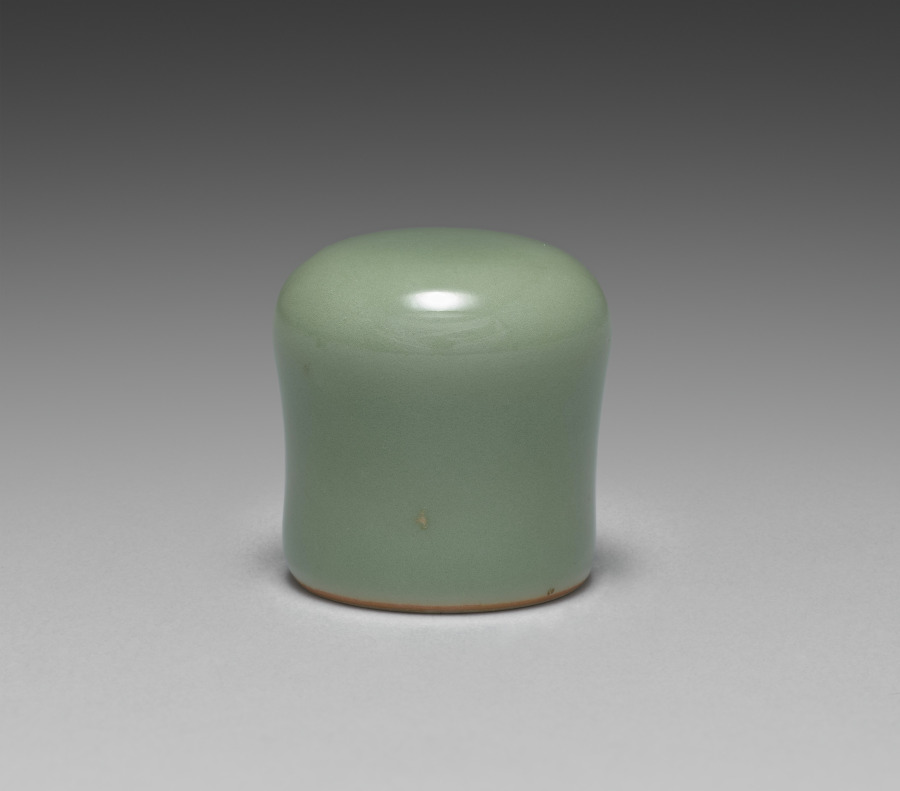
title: Roller End for Hanging Scroll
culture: Japan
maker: Seifū Yohei III (Japanese, 1851–1914)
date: 1893–1914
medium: One of a pair of hanging scroll roller ends; porcelain with celadon glaze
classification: Ceramic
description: Before entering into his apprenticeship with Yohei II, Seifū Yohei III trained as a painter in Osaka. He continued to paint throughout his career as a ceramist. As part of his ceramic practice, Yohei III also made roller ends to be placed at either end of the wooden dowel around which the lower part of a hanging scroll mounting is wrapped. These served both as weights for the painting and as knobs for handling it when rolling and unrolling. The pair here is made of porcelain with a green glaze.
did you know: This is one of two roller ends for the hanging scroll by Seifū Yohei III, Rain Clearing over a Summer’s Mountain, CMA 2022.151.